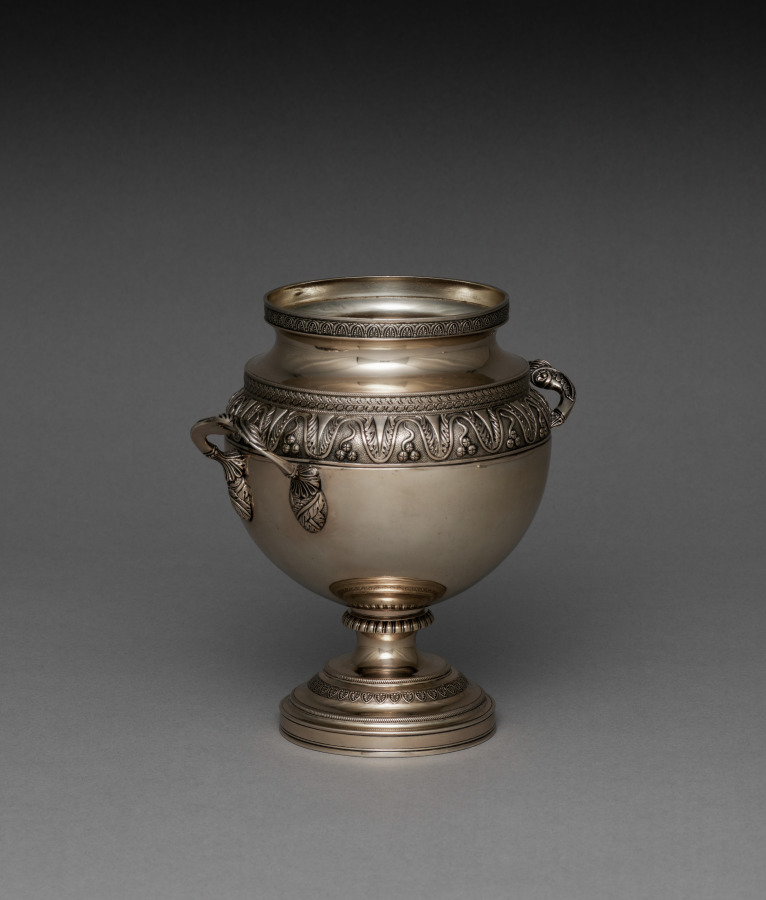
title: Sugar Urn with Cover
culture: America, Pennsylvania, Philadelphia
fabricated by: Harvey Lewis (American, 1835)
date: c. 1811–25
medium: silver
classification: Silver